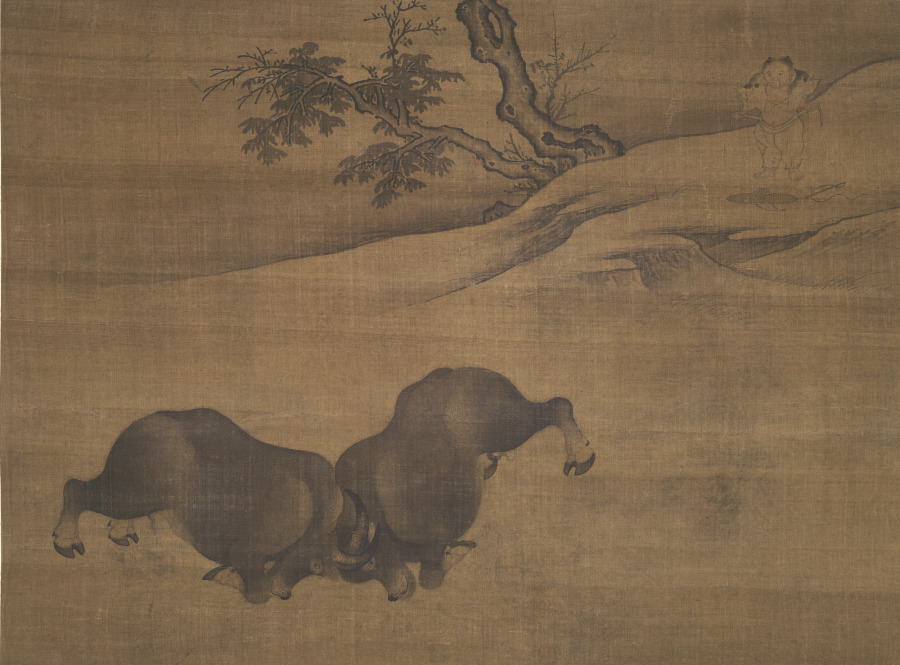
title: Herdboys and Buffalo in Landscape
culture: China, Qixian, Yuan dynasty (1271-1368)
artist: Guo Min (Chinese, mid-late 1200s)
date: 1200s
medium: Hanging scroll; ink on silk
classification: Painting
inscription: 努力還相鬪，爭強不自安。/ 牧童閑退立，解帶靜中看。/ 伯達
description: Herdboys tend their buffalo in a bucolic landscape by a winding stream. Guo Min emphasizes the massive forms and mighty power of the animals, transforming them into forces of nature. The poem on this scroll reads: "The bulls are engaging in fighting, Cautiously, each seeks to overcome the other. The herdboy calmly stands by. Untying his belt, he silently watches."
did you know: Tending water buffalos has traditionally been the task of young boys and can still be seen in rural areas of Southern China today.